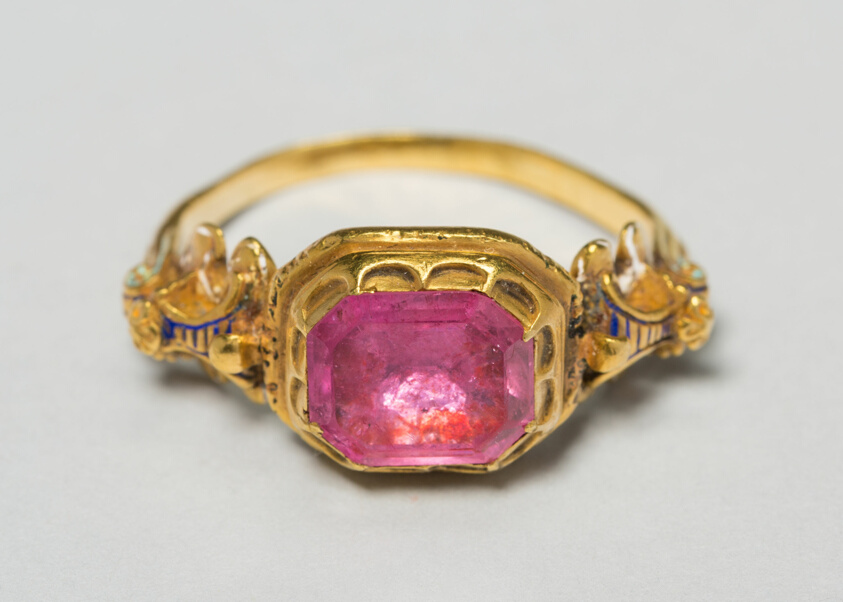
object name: Costume and Accessories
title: Ring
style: Renaissance, 16th Century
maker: Probably Italian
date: c. 1525–c. 1575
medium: Gold, tourmaline, and traces of enamel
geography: Italy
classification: ring (jewelry); jewelry; costume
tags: healing, semi-precious stone